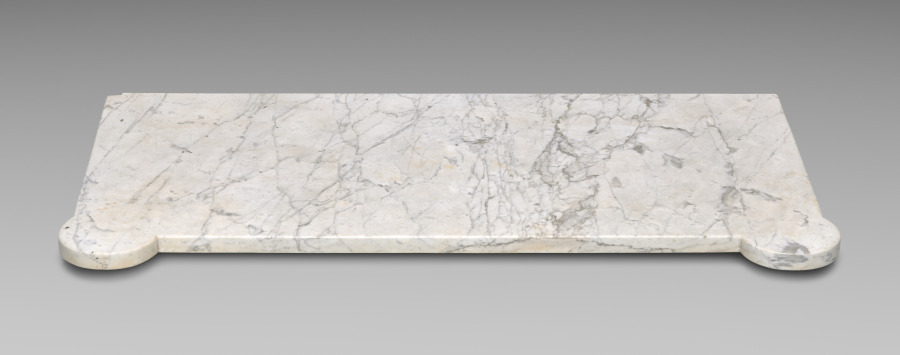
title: Pier Table (marble top)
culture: America, New York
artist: Joseph Meeks and Sons (American)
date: c. 1829–1835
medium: mahogany, marble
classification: Furniture and woodwork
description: Ornamental tables such as this marble-topped example were most often used in rooms on a narrow wall between two windows or just across from them on an opposite wall. Usually a gilded mirror hung above the table to create a single pier of glass, top to bottom, which reflected light around the room. This table’s bold use of carved and stenciled decoration, as well as expensive white marble, indicate that it was owned by a very wealthy family.